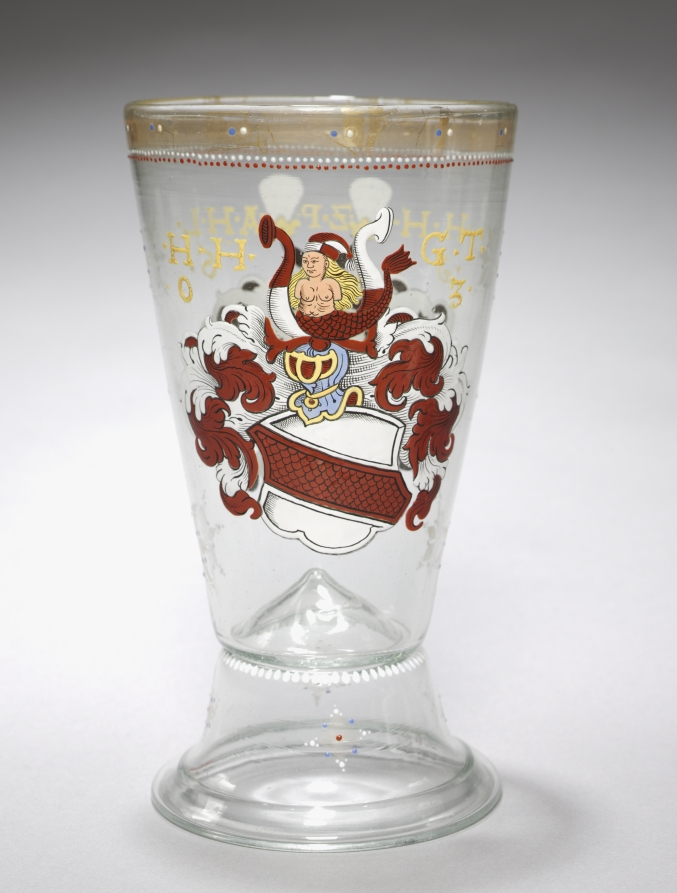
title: Footed Beaker with Two Coats-of-Arms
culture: Germany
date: 1603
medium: enameled glass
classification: Glass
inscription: bears the date: 1603, and unidentified initials.